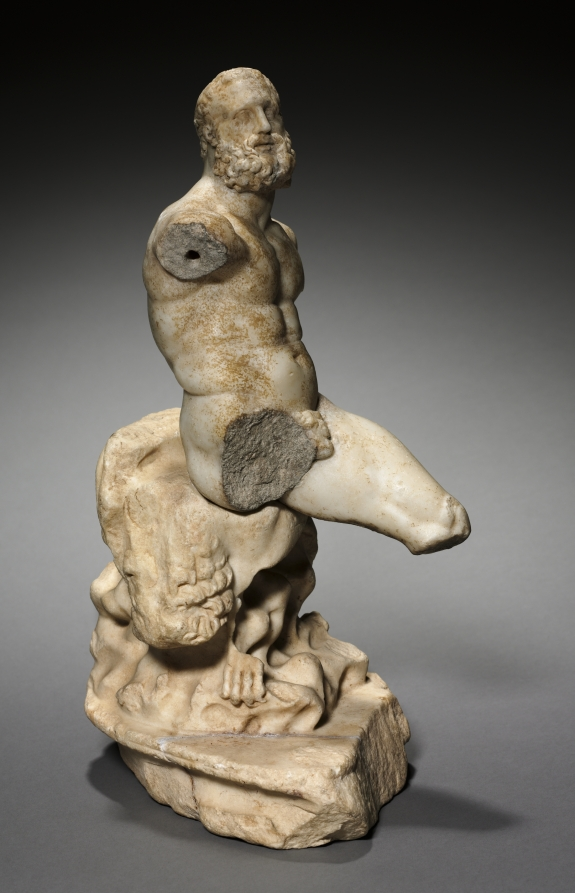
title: Herakles Epitrapezios (Hercules of the Table)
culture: Italy, Roman, Alexandrian(?)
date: 1–100 CE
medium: marble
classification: Sculpture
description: The Roman poets Martial and Statius mention a bronze statuette made by the master Greek sculptor Lysippos (active c. 360s-310s BC). It depicted the Greek hero Herakles seated on a rock with a drinking cup and was created for Alexander the Great, who claimed Herakles as an ancestor and carried the sculpture with him on his military campaigns. Later, the work was said to have been acquired by Hannibal, Sulla, and the famed Roman art collector Novius Vindex. The statuette is called epitrapezios (on the table) either because it was designed to be displayed on a tabletop or because it shows Herakles seated, as at a table. Later sculptors made many more versions, including this one, to meet the demand of Roman collectors enamored with Greek art.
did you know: The sculptor carved Herakles and his rocky seat (covered with his lionskin) from separate marble pieces.